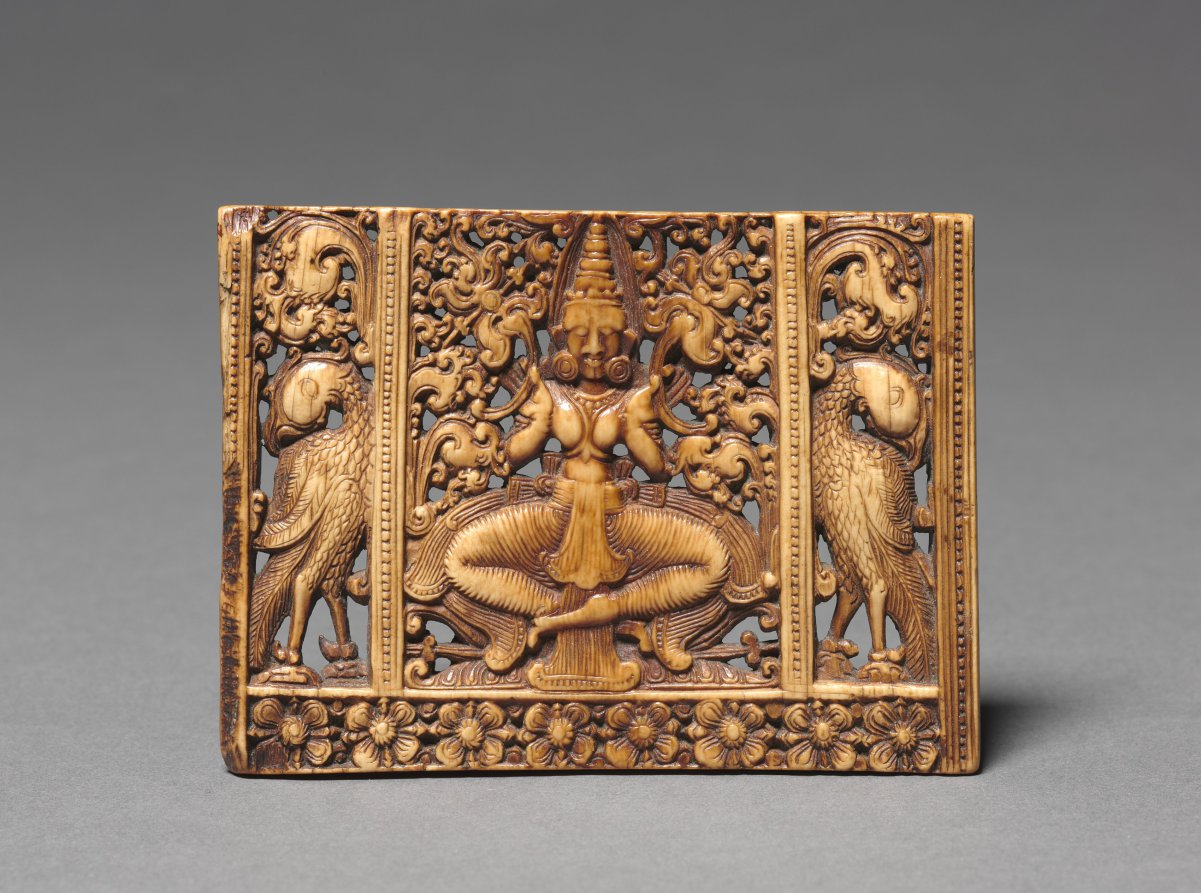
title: Comb Panel with a Seated Devi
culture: Ceylon, Kandy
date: 1600s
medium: ivory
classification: Ivory